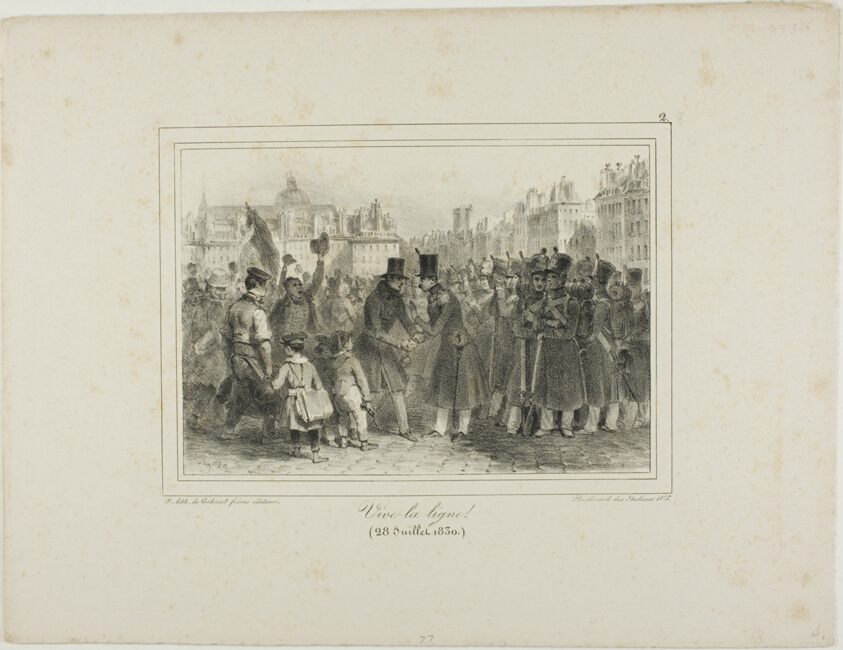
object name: Print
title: Long Life to the Troops!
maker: Denis Auguste Marie Raffet (French, 1804-1860); printed by Chez Gihaut Frères (French, 19th century)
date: July 28, 1830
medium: Lithograph in black on ivory wove paper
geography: France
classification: lithograph; print; prints and drawing